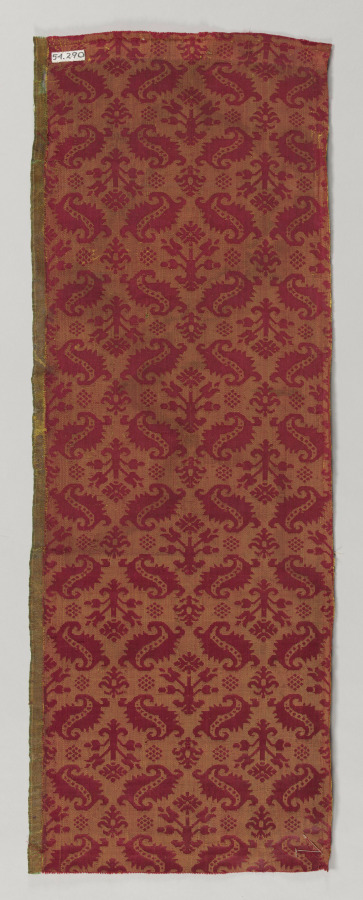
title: Silk Fragment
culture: Italy or Spain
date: 1600s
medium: damask: silk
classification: Textile